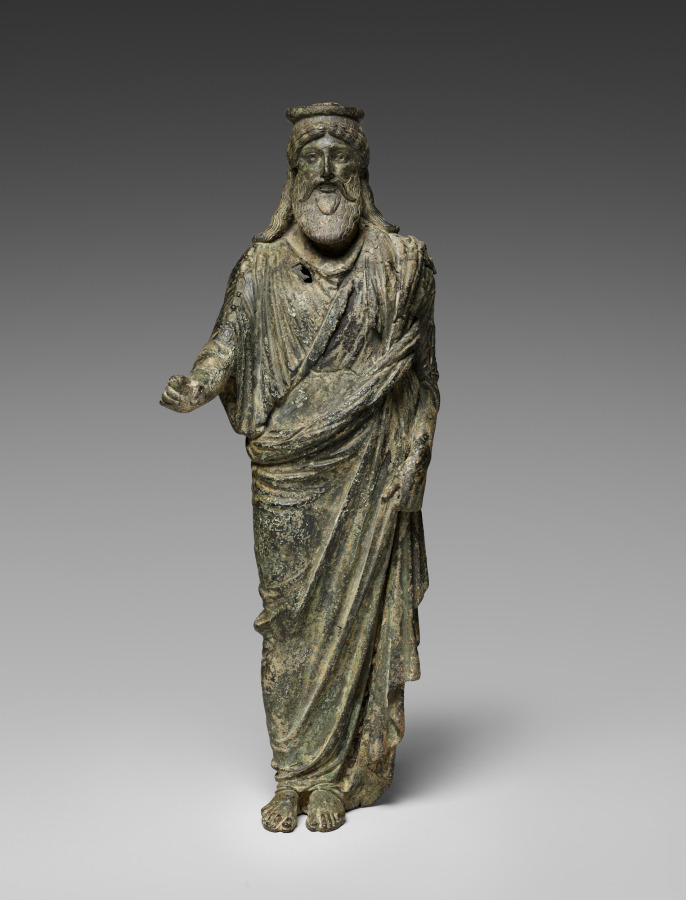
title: Statuette of Dionysos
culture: Italy, Roman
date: 50 BCE–50 CE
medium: bronze and silver and traces of gilding, hollow cast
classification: Sculpture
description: This bronze figure of Dionysos, the god of wine, theater, and the mysteries, is presented in a style recalling Archaic Greek art, most noticeably in his stiff pose and trimmed beard. The more naturalistic folds of his garment speak to a later date, in the Roman period. The disk attached at the top of the head suggests that this figure was once part of an ornate piece of furniture, perhaps a stand or support. In his right hand, the god likely held a kantharos or other attribute. He would have been further embellished with inlaid copper (lips), silver (whites of eyes), and perhaps gilding (garment).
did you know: Over his long, thin garment, Dionysos wears an animal skin, fastened on his left shoulder.